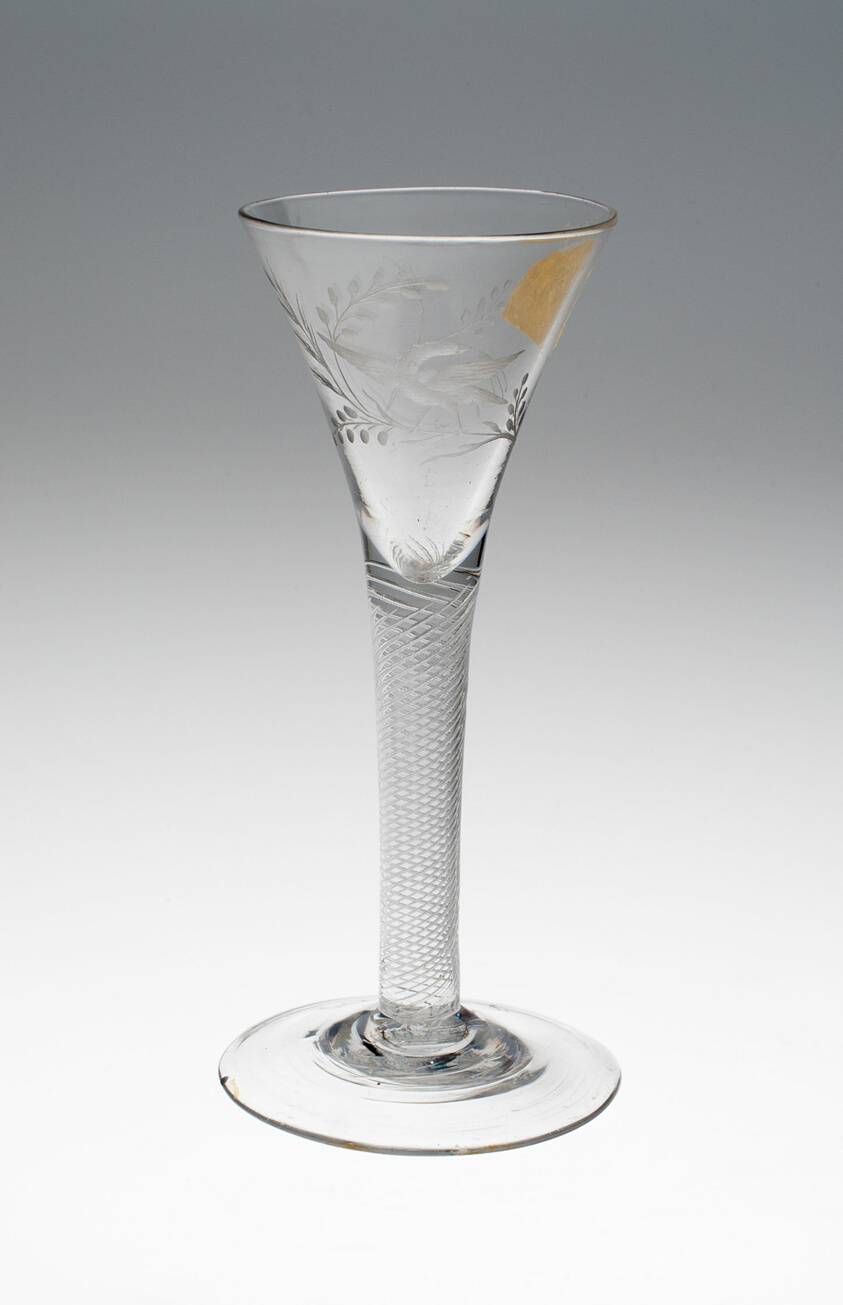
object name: Glass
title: Wine Glass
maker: England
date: c. 1760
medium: Glass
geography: England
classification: drinking vessel; glass; european decorative arts